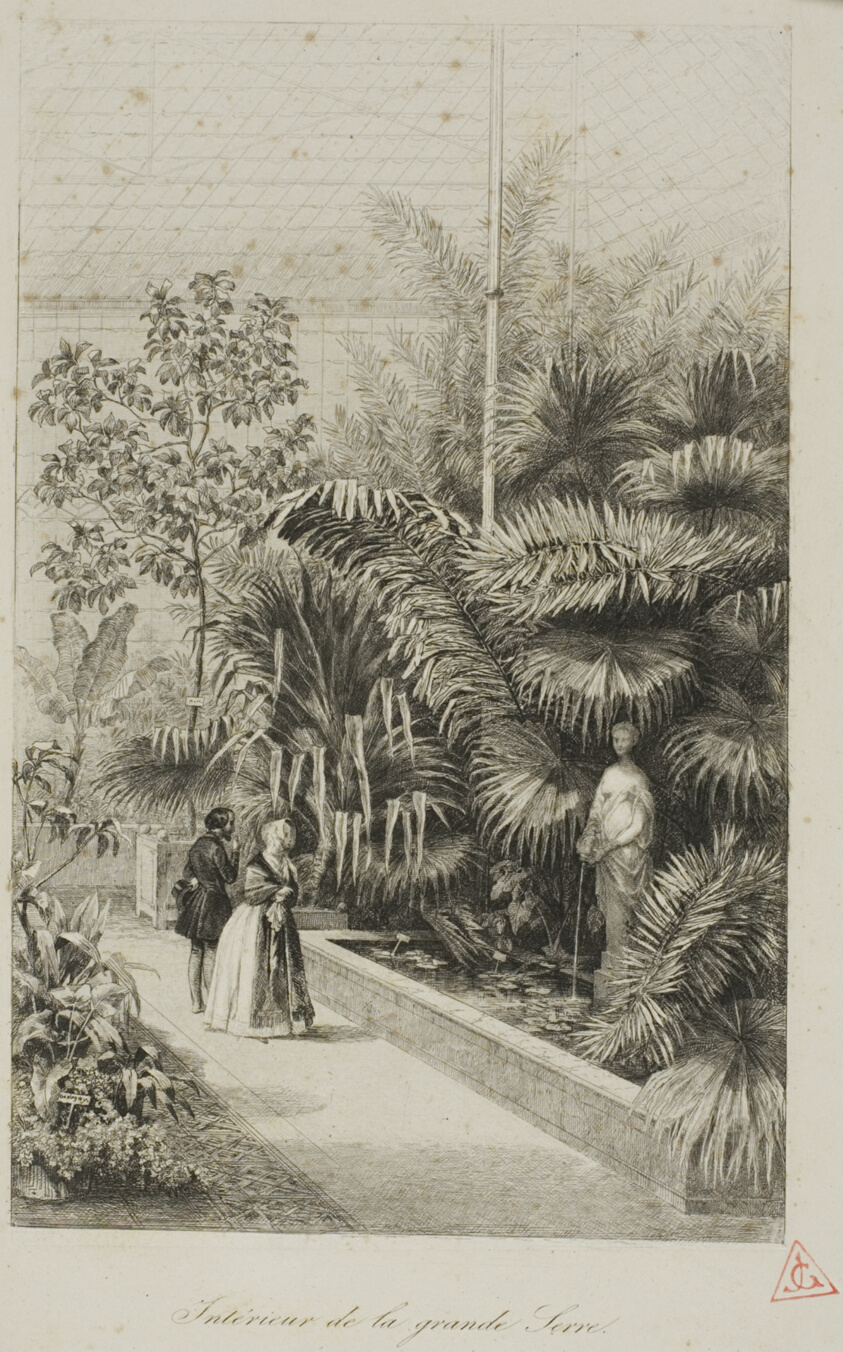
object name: Print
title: Interior of the Large Greenhouse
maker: Charles François Daubigny (French, 1817-1878)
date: 1842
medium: Etching on white wove paper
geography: France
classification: etching; print; prints and drawing